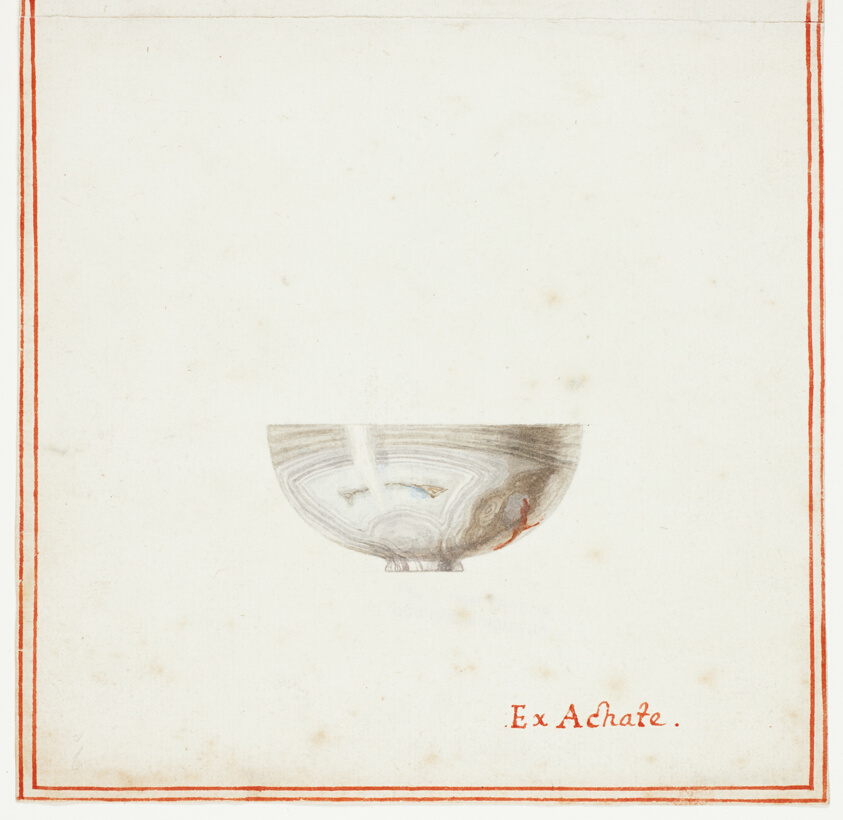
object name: Drawing and Watercolor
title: Agate Bowl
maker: Giuseppe Grisoni (Italian, born Flanders, 1699-1769)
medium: Gouache over black chalk, on ivory laid paper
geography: Flanders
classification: gouache; watercolor; drawings (visual works); prints and drawing